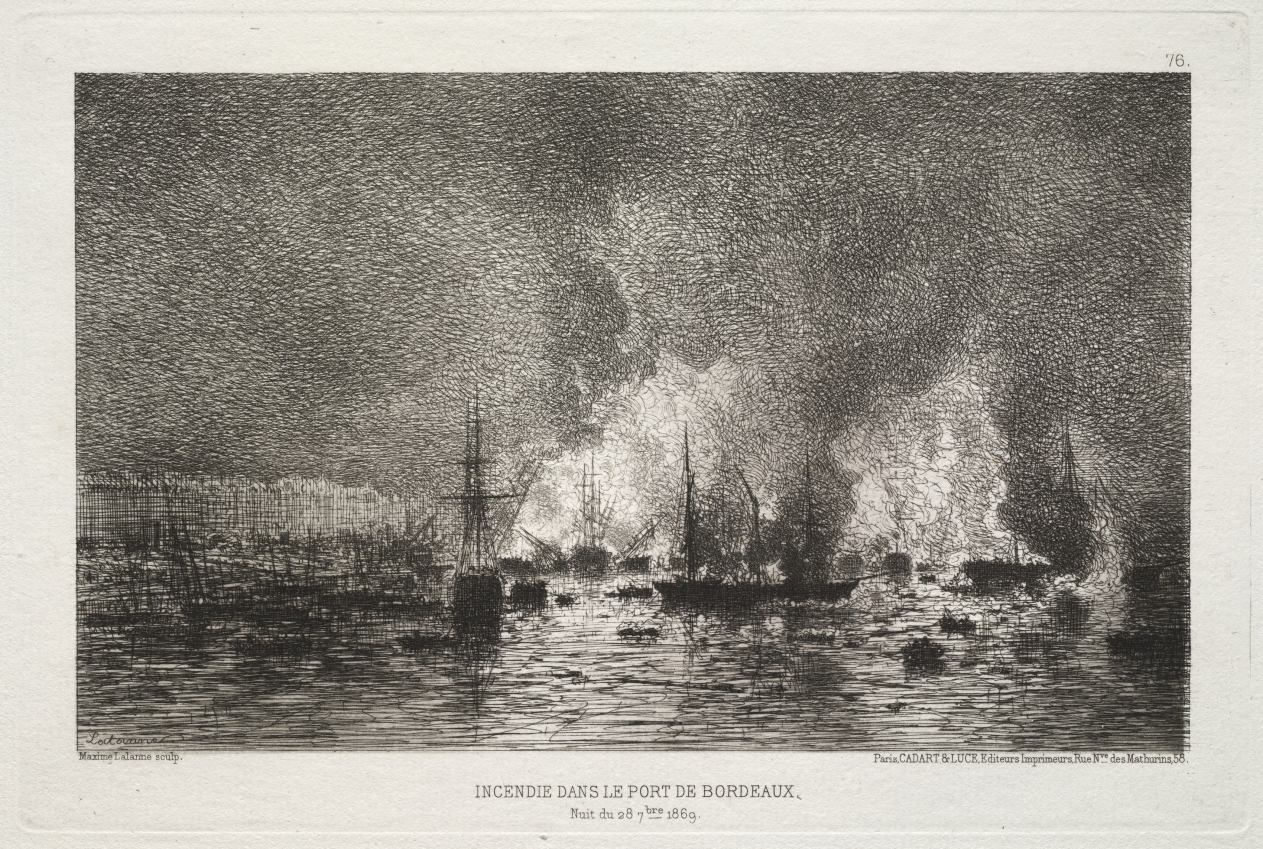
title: Conflagration in the Port of Bordeaux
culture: France, 19th century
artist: Maxime Lalanne (French, 1827–1886)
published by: Cadart & Luce, rue Nve des Mathurins, 58, Paris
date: 1869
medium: etching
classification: Print